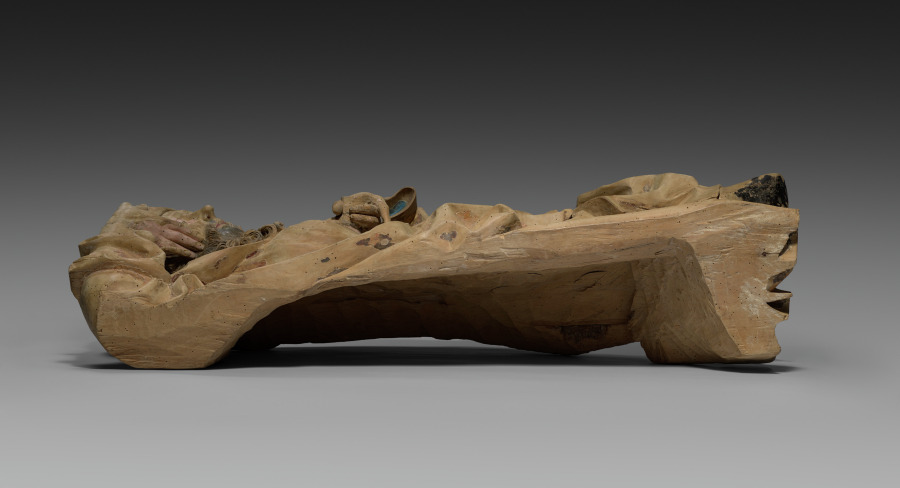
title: Jesse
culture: Germany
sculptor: Veit Stoss (German, c. 1445–1533)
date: c. 1500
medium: Limewood, polychromed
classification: Sculpture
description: The figure shows the sleeping Jesse, the father of David from the Old Testament. As the ancestor of the family tree of Christ, he was depicted in the Middle Ages sleeping as the starting point of the tree, on whose branches the ancestors of Christ are depicted. Mary with the Christ child is always shown at the top. The figure comes from a wooden altarpiece from an unknown church, possibly in Nuremberg, which is now lost. Veit Stoss is one of the most prominent German sculptors around 1500 who was mainly active in Nuremberg (Bavaria, Germany) and Krakow (Poland), also as a painter and engraver.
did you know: The family tree of Christ starts from Jesse, the father of David in the Old Testament.